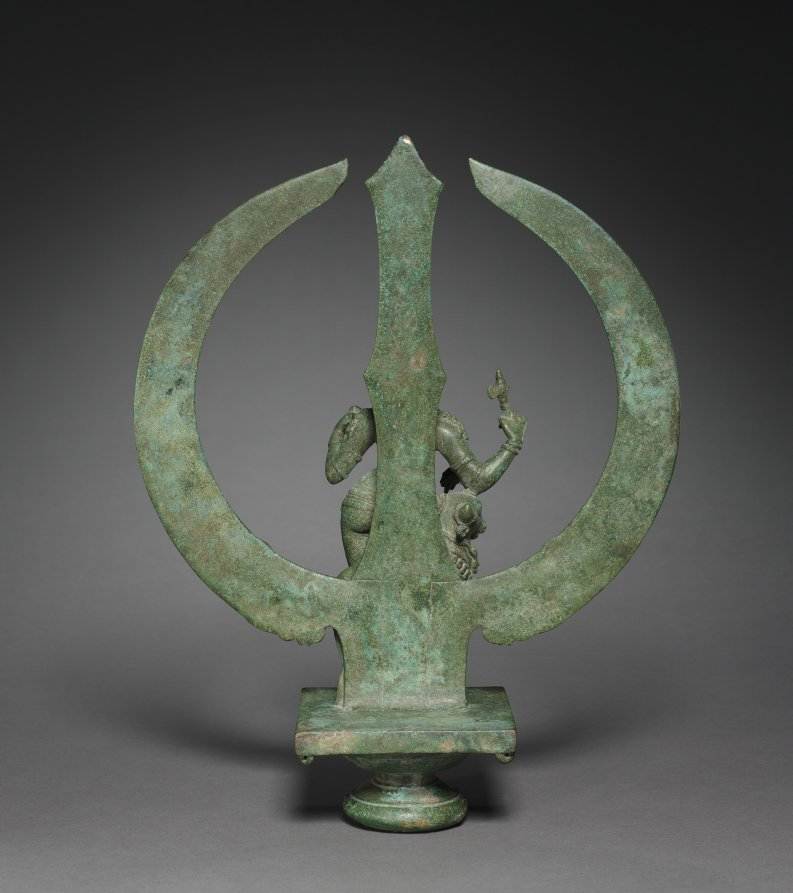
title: Trident with Shiva as Half-Woman (Ardhanarishvara)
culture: South India, Tamil Nadu, Chola period (900-13th Century)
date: c. 1050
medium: bronze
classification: Sculpture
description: The form of the trident—the main weapon of the Hindu god Shiva—dramatically and elegantly encircles his form in which the left side is female and the right side is male. The male side has the matted locks of a yogi piled high on his head; he holds an ax and leans on his mount, the bull. The female side has a jeweled crown, earring, full breast, broad hips, long skirt, and only one arm. The lower hands probably held a stringed instrument. This particular iconic form of Shiva visually indicates that he embodies all phenomena, even if they seem contradictory. He is male and female, destructive and creative, yogi and royal sovereign, hunter and musician.